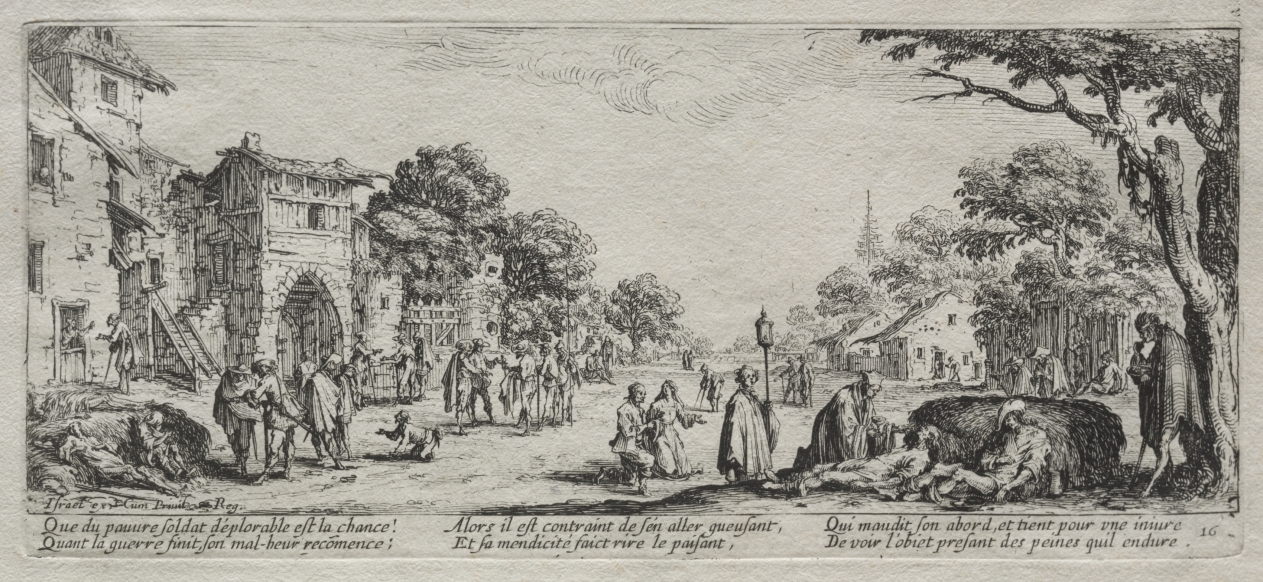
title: The Large Miseries of War: The Beggars and the Dying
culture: France, 17th century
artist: Jacques Callot (French, 1592–1635)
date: 1633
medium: etching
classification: Print